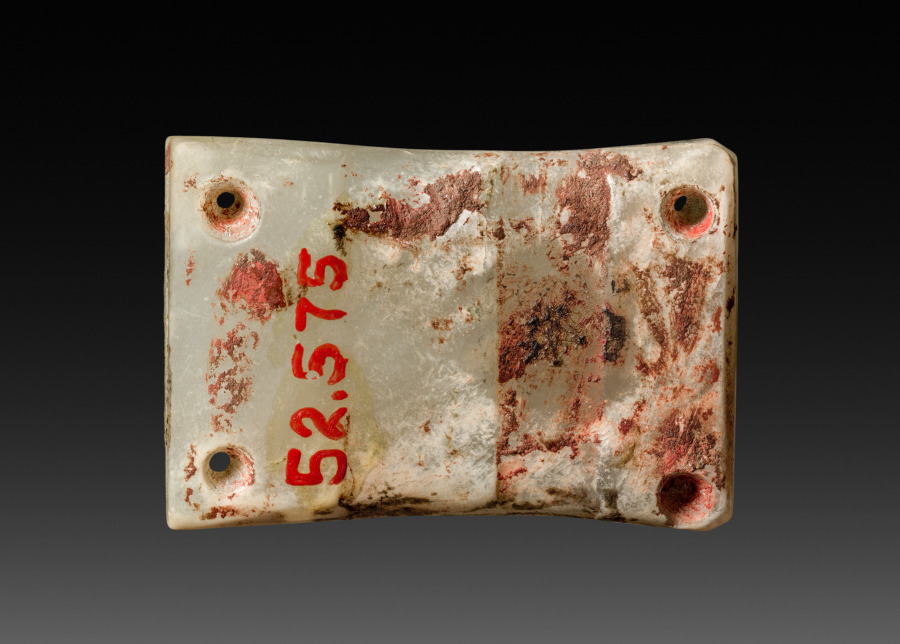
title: Plaque with Paired Birds for Belt or Shroud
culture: China, Western Zhou dynasty (c. 1046–771 BCE)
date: 1100–1000 BCE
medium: jade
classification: Jade